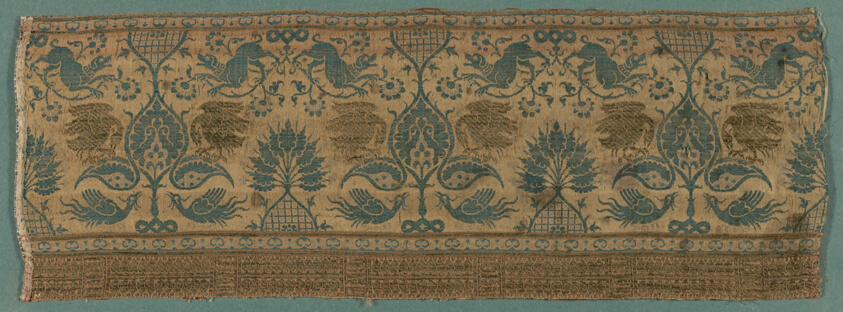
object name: Textile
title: Fragment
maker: Italy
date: 14th century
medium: Silk, gilt-animal-substrate-wrapped linen, warp-float faced 2:1 'S' twill weave with supplementary patterning weft and brocading wefts tied by secondary binding warps in plain and twill interlacings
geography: Italy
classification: textile; weaving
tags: dogs, animals